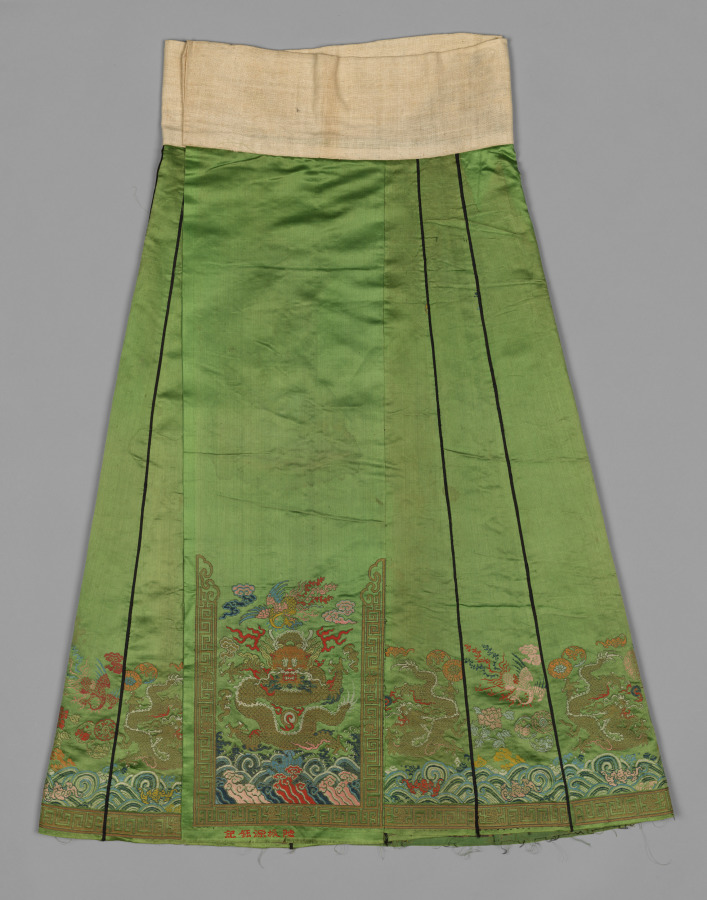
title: Skirt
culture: China, Qing dynasty (1644-1911)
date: late 1800s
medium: Silk and gold thread: embroidery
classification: Garment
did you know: This is a bridal skirt that would be worn with a coat like CMA 1916.1355.